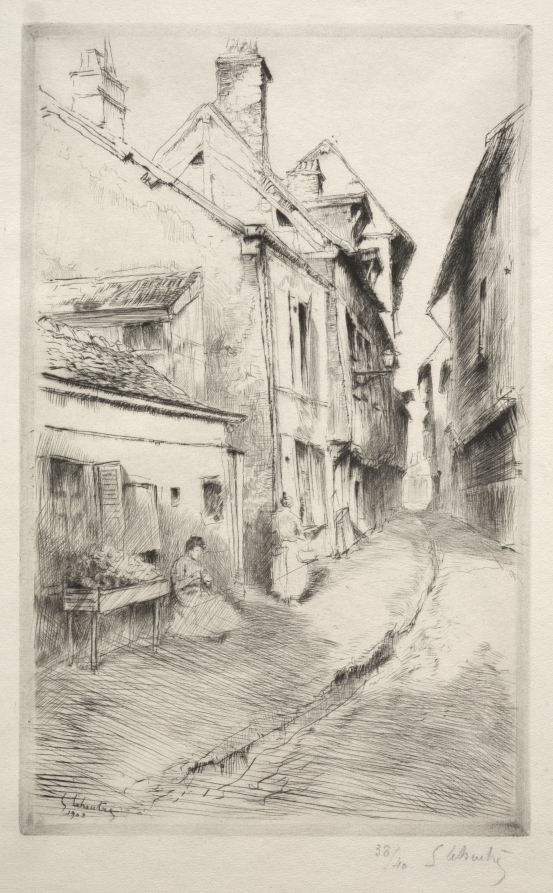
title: La rue de l'Ecole à Troyes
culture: France, 19th-20th Century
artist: Gustave Leheutre (French, 1861–1932)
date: 1902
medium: etching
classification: Print